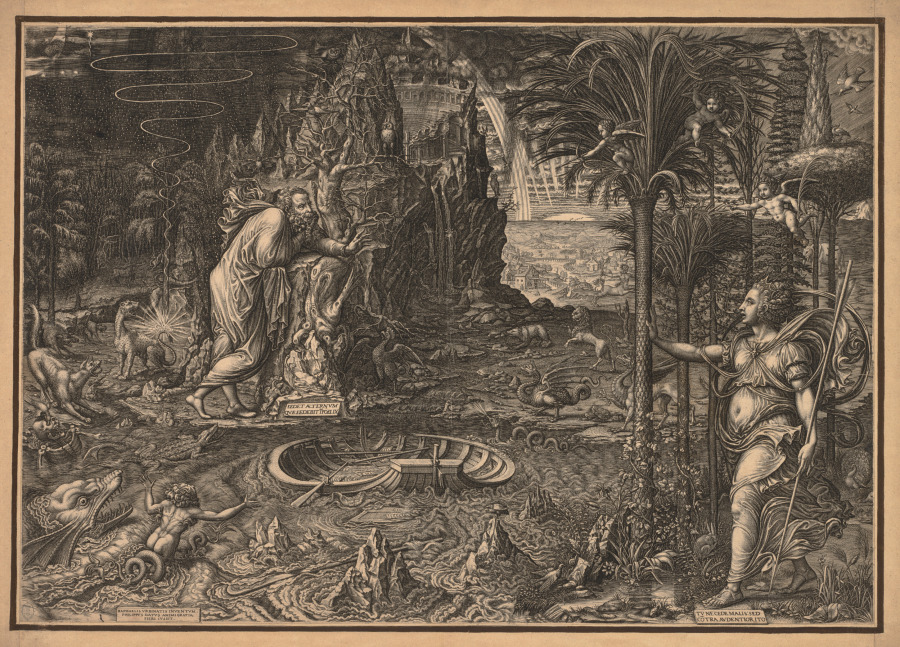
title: Allegory of Life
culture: Italy, 16th century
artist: Giorgio Ghisi (Italian, 1520–1582)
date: 1561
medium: engraving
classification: Print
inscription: center, in plate: SEDET ÆTERNVM / QVE SEDEBIT IFOELIX [line over the 'I' beginning IFOELIX] ; lower left, in plate: RAPHAELIS VRBINATIS INVENTVM. / PHILIPPVS DATVS ANIMI GRATIA / FIERI IVSSIT. ; lower center, on tablet in boat, in plate: GEORGIVS / GHISI MAT. / .F 1.5.6.1. [line over 'A'] ; lower right, in plate: TV NE CEDE MALIS : SED / COTRA AVDENTIOR ITO [line over 'O' in COTRA] ; VERSO, center, in pen and brown ink: [illegible word crossed out] ; lower right, in graphite: 7073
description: This engraving presents a complex allegory whose complete meaning remains unclear, although the plaques at the feet of the man and woman may provide one clue. The inscriptions come from the sixth book of Virgil’s Aeneid: "He who sits unfortunate will sit forever," and "Do not yield to adversities, but go out to meet them bravely." The print’s details do not correspond directly to any episode from Virgil, although book six, in which Aeneas descends into the underworld, is an allegory of human life. A similar theme could be suggested here, communicating an essentially hopeful message of overcoming tribulation.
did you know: Ghisi was trained in the creation of luxury metalwork, specifically armor, informing his highly skilled and complex engraving of the copperplate used to make this print.